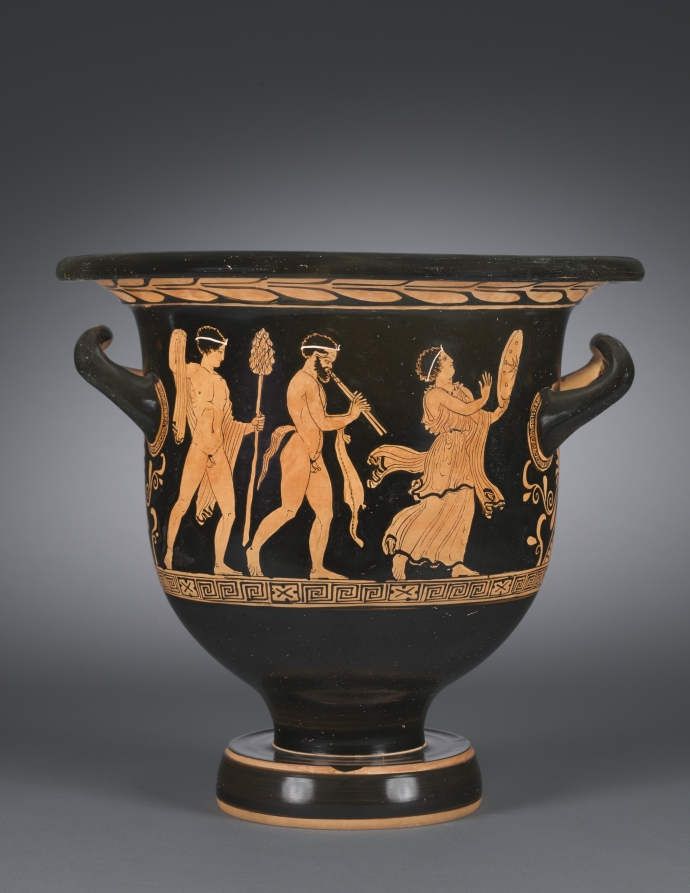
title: Red-Figure Bell-Krater (Mixing Vessel): Bust of Dionysos and Comic Actors (A); Dionysos, Satyr, Maenad (B)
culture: South Italian, Apulian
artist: attributed to Choregos Painter (South Italian, Apulian, active c. 390–380 BCE)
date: c. 390–380 BCE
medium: ceramic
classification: Ceramic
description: Dionysos, the god of wine, theater, and the mysteries, dominates both sides of this bell-krater, a vessel for mixing water and wine. On the front, he appears in bust form, wearing a fillet and laurel wreath. Over his shoulder and behind his head rests his thyrsos, sprouting grapevines. Comic actors, identifiable by their masks and padded costumes, flank the colossal bust, stretching for a bunch of grapes on the left and holding a large skyphos (wine cup) on the right. On the reverse, Dionysos marches in procession with his retinue, a satyr and maenad.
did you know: The large bust of Dionysos may represent a stage prop or symbolize the multifaceted god.